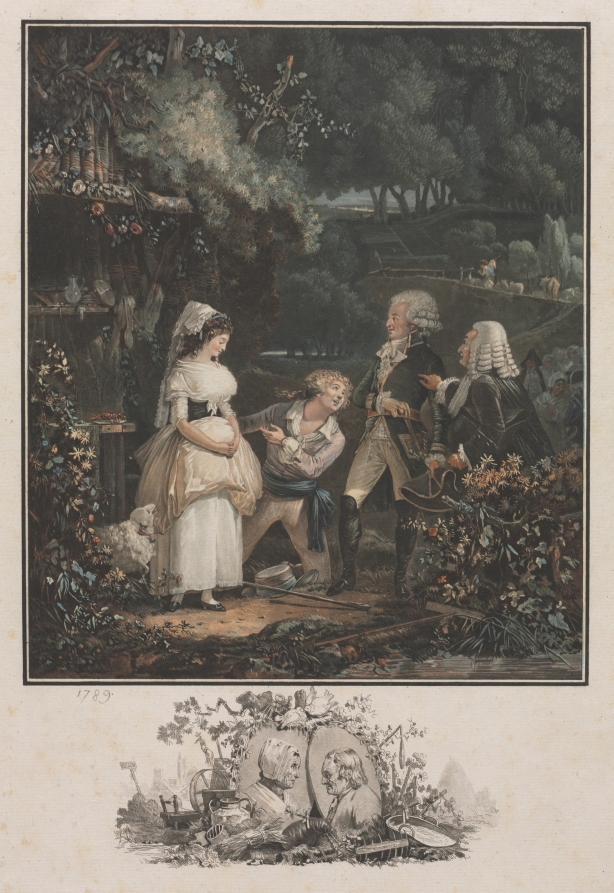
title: Annette and Lubin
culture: France, 18-19th Century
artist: Philibert Louis Debucourt (French, 1755–1832)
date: 1789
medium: color engraving and etching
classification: Print